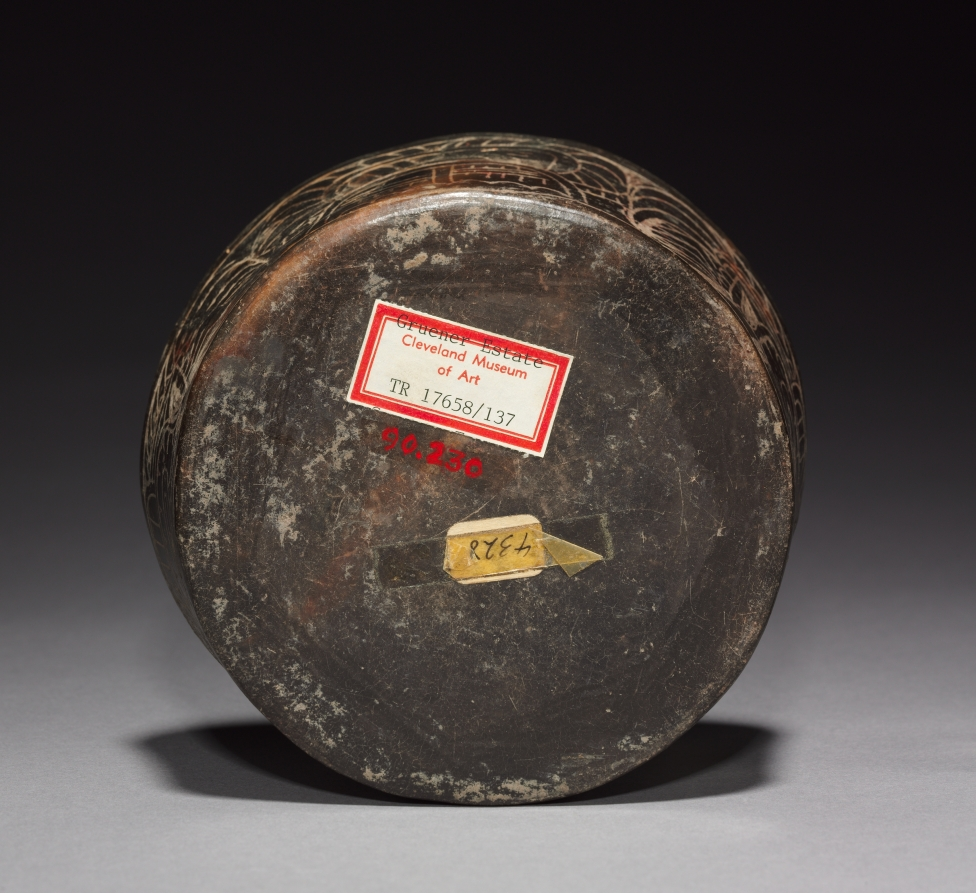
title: Bowl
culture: Central Mexico, Teotihuacán, Classic period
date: 1–550 CE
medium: ceramic, pigment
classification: Stone